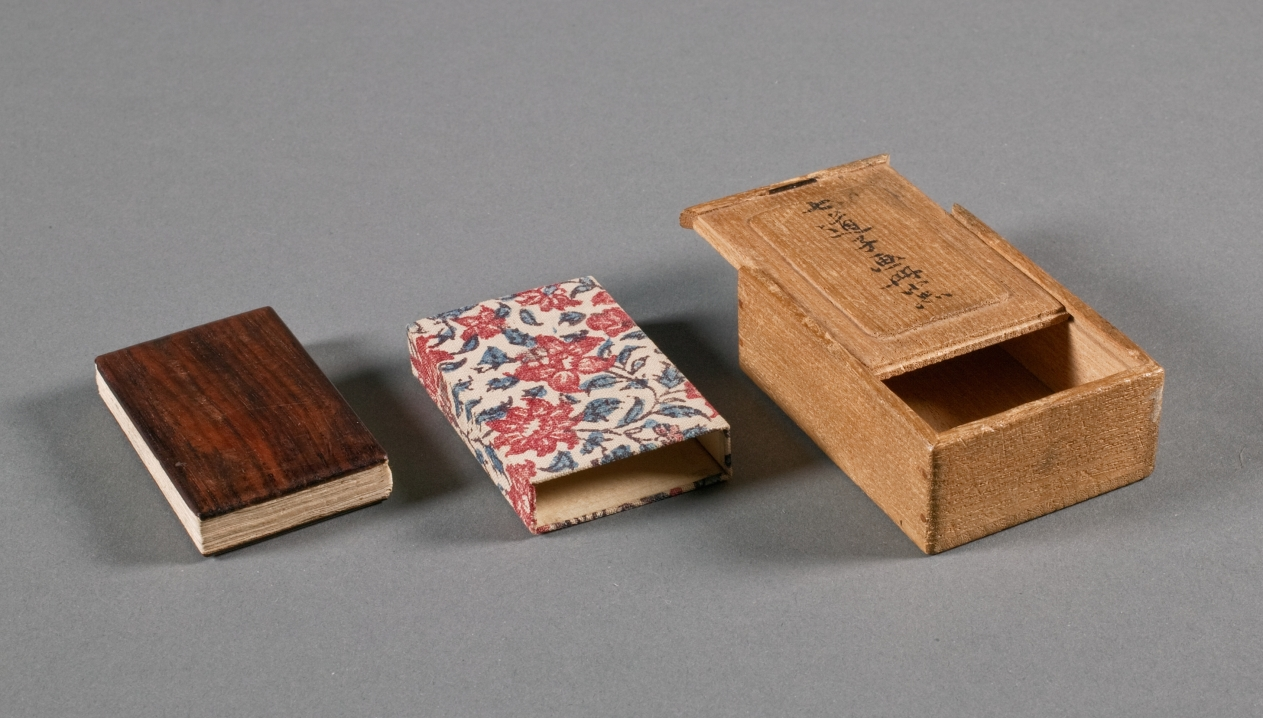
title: Miniature Album with Figures and Landscape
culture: China, Qing dynasty (1644–1911), Qianlong reign (1736–95)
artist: Zeng Yandong (Chinese, c. 1751–1827)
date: 1822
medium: Album of twelve leaves, ink and color on paper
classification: Painting